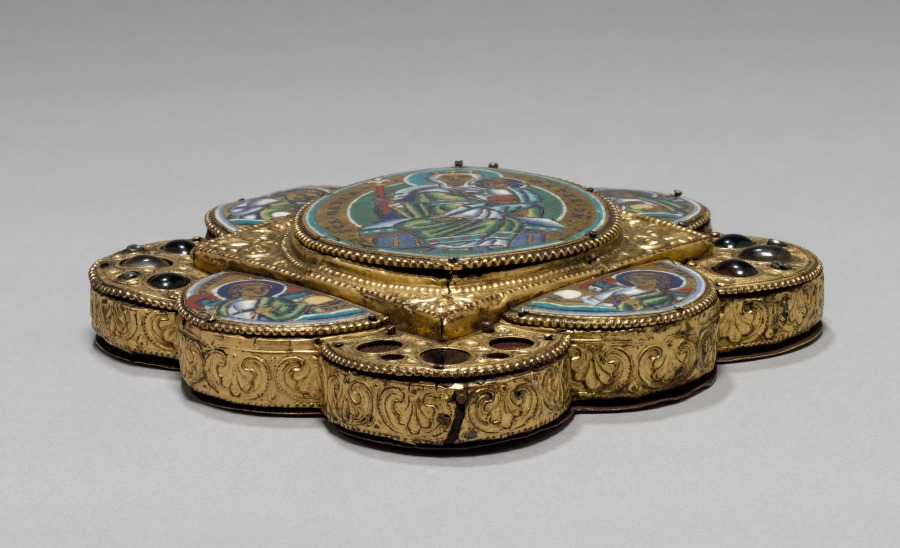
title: Pendant with the Virgin and Child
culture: Mosan, Meuse Valley, Romanesque period, 12th century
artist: circle of Godefroid de Huy (Netherlandish)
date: c. 1160–1170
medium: gilded copper, champlevé enamel; the reverse decorated in vernis brun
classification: Enamel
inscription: S[AN]C[T]A MARIA MATER D[OMI]NI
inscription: HVMILITAS; VIRGINITAS; MISERICORDIA; PIETAS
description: This pendant was made in the Rhine-Meuse region—now in modern Belgium—renowned for the production of fine metalwork objects, especially enamels. An enamel plaque depicting the enthroned Virgin and Christ child dominates the pendant. Four peripheral enamels depict angelic figures representing virtues: Humility, Virginity, Piety, and Mercy, each identified by an inscription. The pendant may have been made to serve as a reliquary to house a consecrated host. The refined craftsmanship and costly materials fittingly honor these sacred remains.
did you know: The outer lobes contain cabochons, gemstones that have been shaped and polished resulting in a rounded top and flat bottom, of garnet, glass, and quartz.